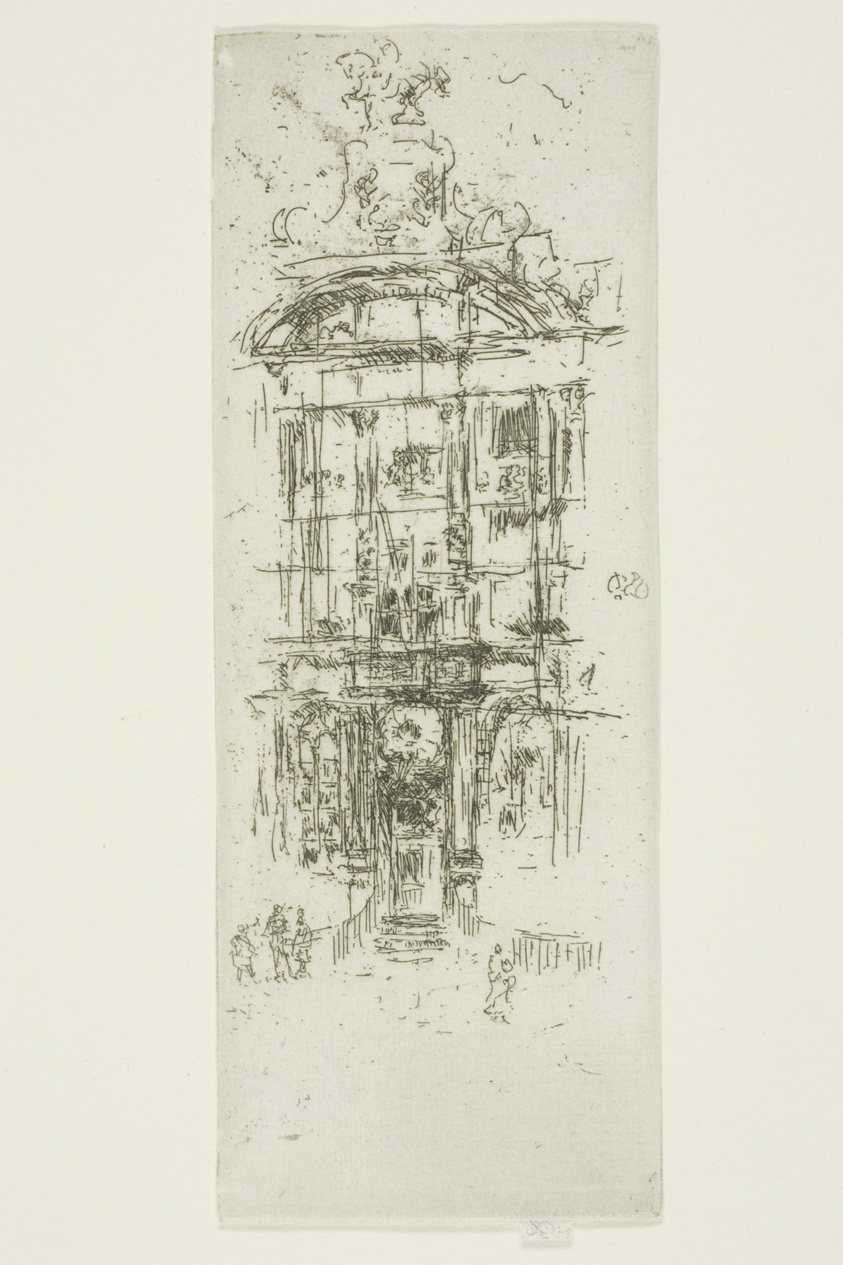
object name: Print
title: Gold House, Brussels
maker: James McNeill Whistler (American, 1834-1903)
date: 1887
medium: Etching with foul biting in black ink on off-white laid paper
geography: United States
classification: etching; foul biting; print; prints and drawing; paper